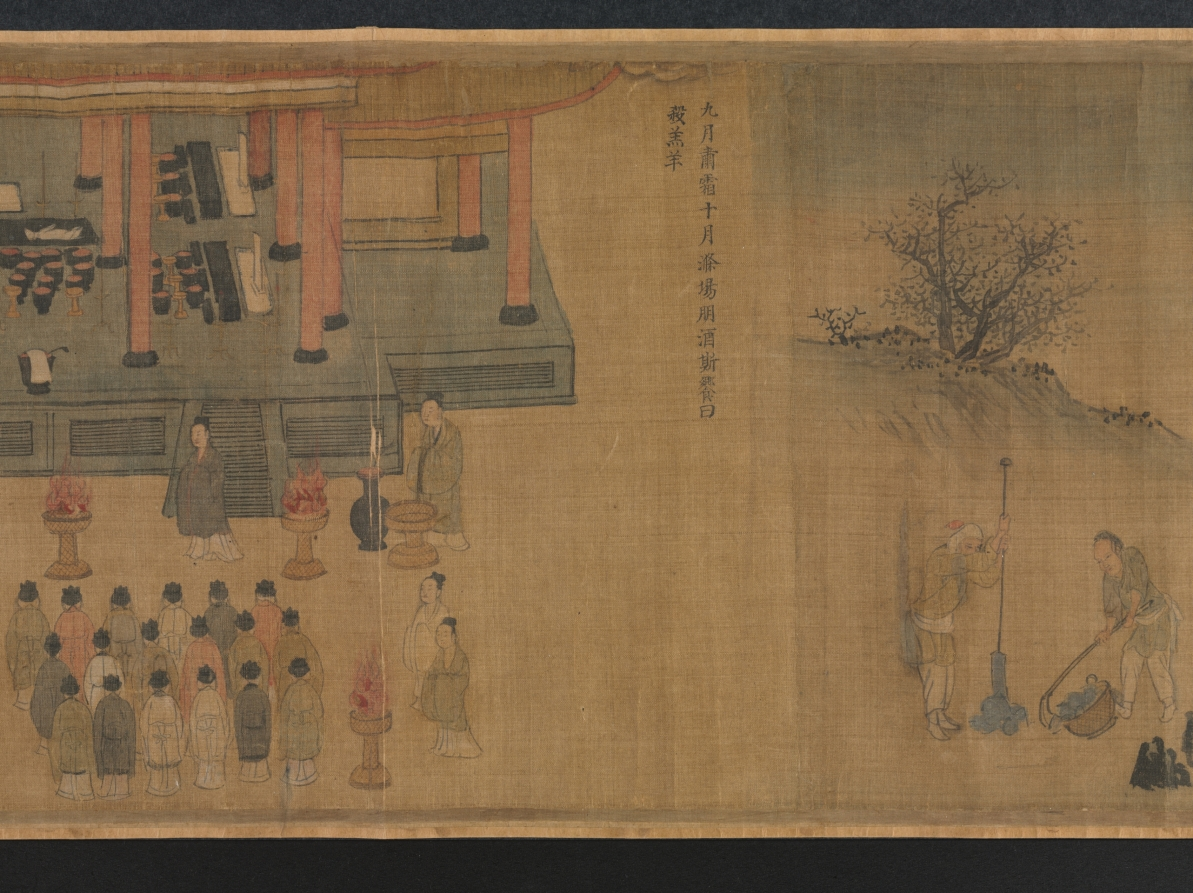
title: "Seventh Month" from the Odes of Bin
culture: China, Southern Song dynasty (1127-1279)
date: 1200s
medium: Handscroll; ink and color on silk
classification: Painting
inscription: Colophons: 1. [on the frontispiece] by the Qianlong emperor (dated 1741). 2. by Lu Wan (dated Zhengde dingchou, 1517). 2. by the Jiaqing emperor (dated 1807).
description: According to Confucian thought, the ruler looks after the well-being of his people which involves agricultural activities. Seventh Month from the ancient Odes of Bin in the Shijing (Book of Poetry) describes occupations throughout the year, including plowing, harvesting, hunting, making clothes, and observing rituals. The earliest illustrations of these Odes accompanied by text were commissioned by Southern Song emperor Gaozong (reigned 1127–1162). As the lower Yangzi delta had become the new seat of government, Gaozong had sets of these illustrations produced by court artists to revive the dynasty and convince the Confucian officialelite of his legitimacy to rule.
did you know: The Odes of Bin appears in the classic Shijing (Book of Poetry), an anthology of more than 300 poems, folk songs, and ceremonial hymns that were originally chanted to music.